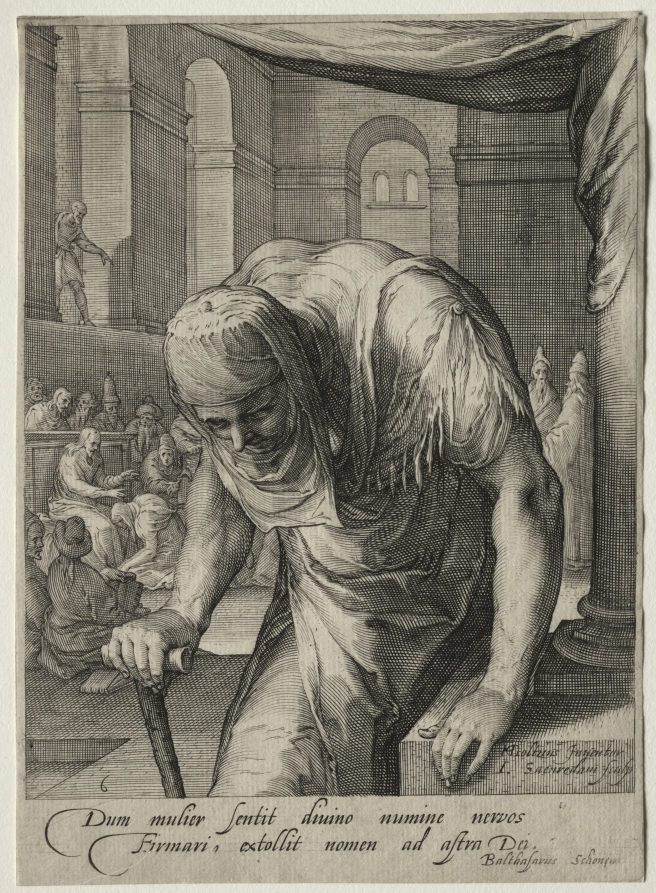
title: Heroines of the New Testament: The Crippled Woman Healed by Christ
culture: Netherlands, 16th century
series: Heroines of the New Testament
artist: Jan Saenredam (Dutch, 1565–1607)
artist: after Hendrick Goltzius (Dutch, 1558–1617)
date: c. 1595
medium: engraving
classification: Print